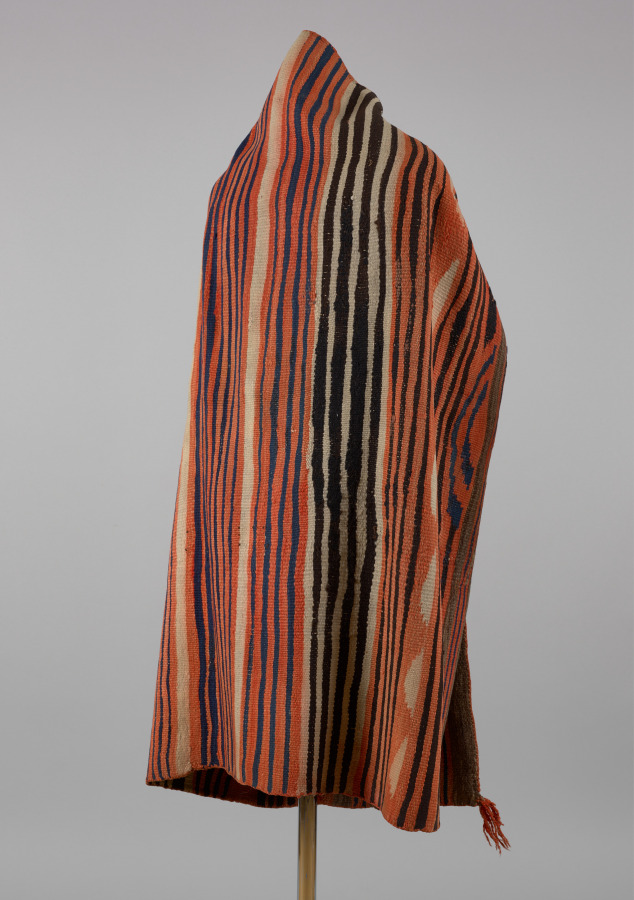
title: Banded Wearing Blanket (Diyugi)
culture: America, Native North American, Southwest, Diné (Navajo) or Zuni Pueblo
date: c. 1880–90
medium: Wool (handspun and bayeta): tapestry weave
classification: Textile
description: This blanket was created during the late 1800s, when weavers in the Southwest began to shift from making garments for Indigenous use, including trade, to additionally create items for non-Native collectors. In this new market, traditional wearing blankets, which were worn around the shoulders, were marketed as rugs.